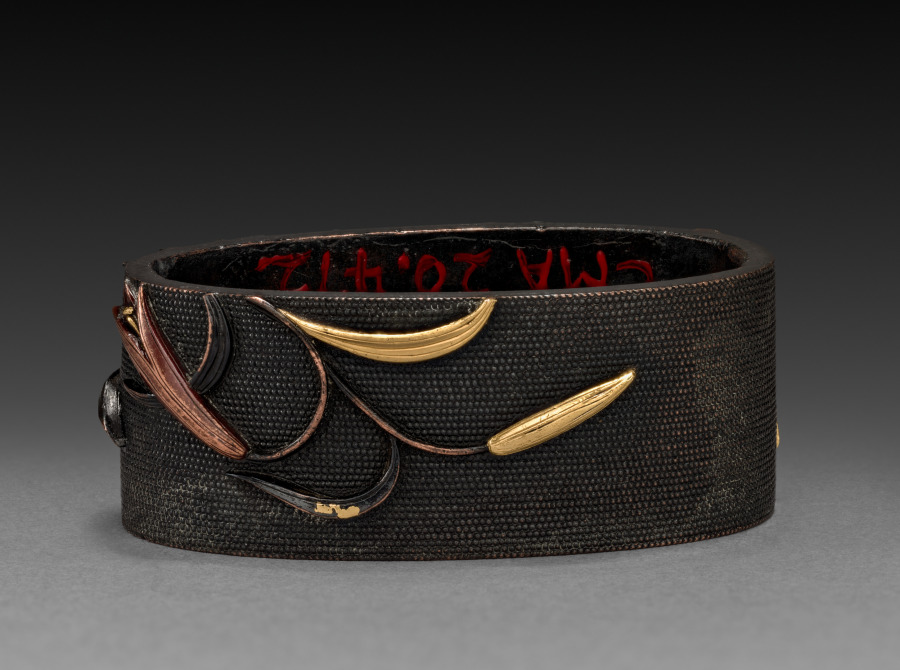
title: Sword-Hilt Collar (Fuchi)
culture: Japan, Edo period (1615–1868)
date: 1700–1850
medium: shakudo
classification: Arms and Armor